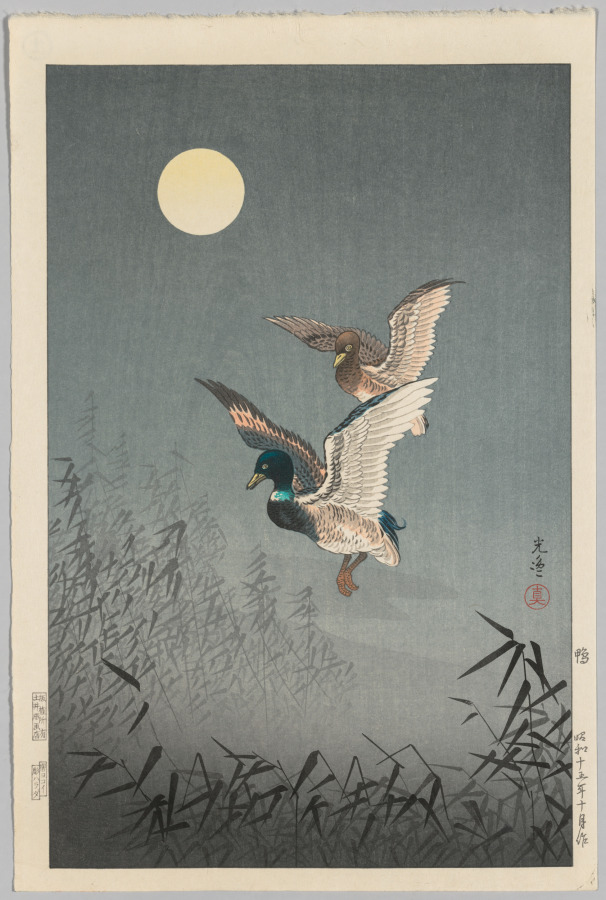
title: Tokyo Views: Ducks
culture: Japan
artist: Tsuchiya Kōitsu (Japanese, 1870–1949)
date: 1940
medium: color woodcut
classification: Print